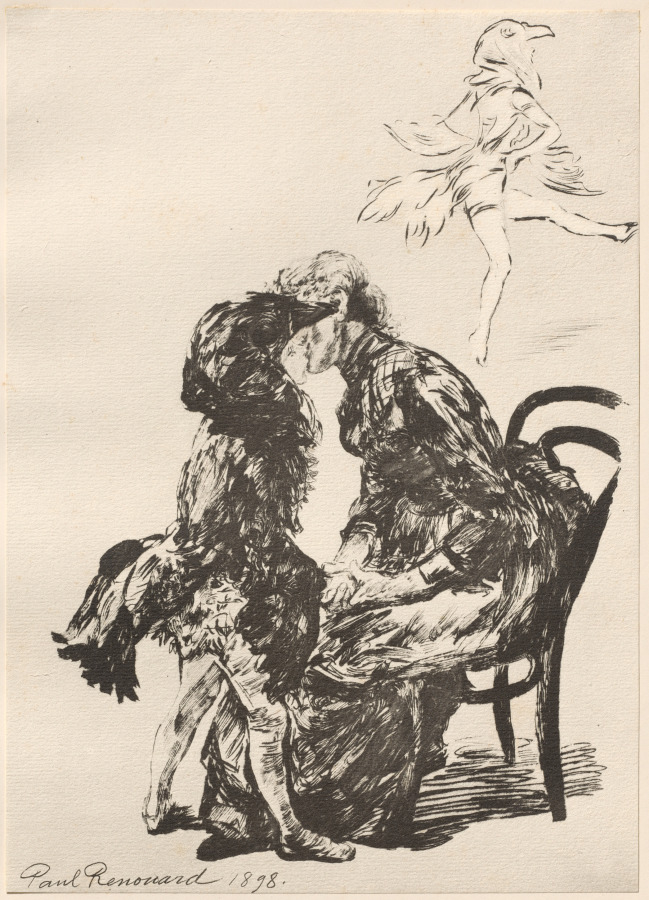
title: Avant Le Ballet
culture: France, Paris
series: L'Estampe Moderne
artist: Charles Paul Renouard (French, 1845–1924)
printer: Imprimerie Champenois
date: 1898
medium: Color lithograph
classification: Bound Volume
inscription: In plate: lower margin of image: Paul Renouard 1898; lower right corner of secondary support: blindstamp of l'Estampe Moderne (Lugt 2790)